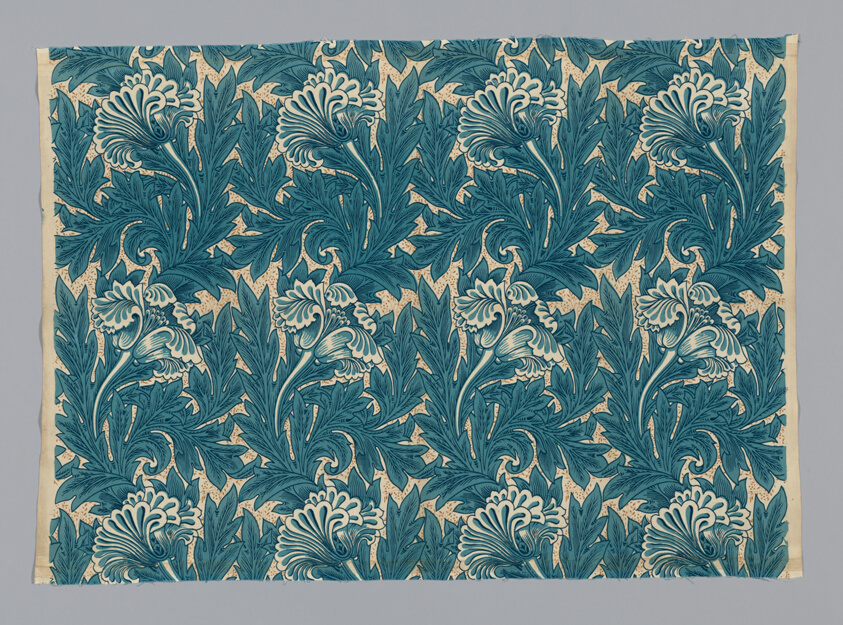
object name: Textile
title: Tulip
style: Arts and Crafts Movement, british, 19th century, 20th Century, British Arts and Crafts Movement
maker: Designed by William Morris (English, 1834–1896); Produced by Morris & Co., London (English, 1875–1940); Wardle & Co., Bridgnorth (English, 1875-1930)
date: Design 1875, made 1917–25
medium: Cotton, balanced plain weave; block printed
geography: England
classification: textile; weaving - printed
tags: botanical, foliage, floral